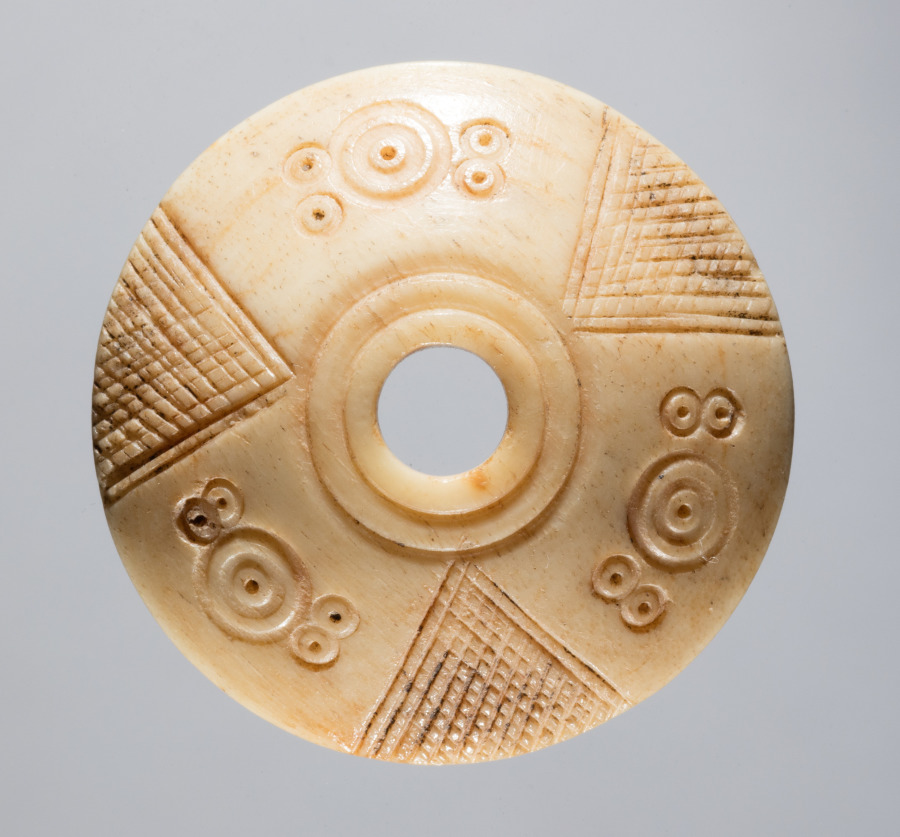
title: Spindle Whorl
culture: Iran, early Islamic period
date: 700s - 900s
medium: bone, incised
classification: Spindle Whorl